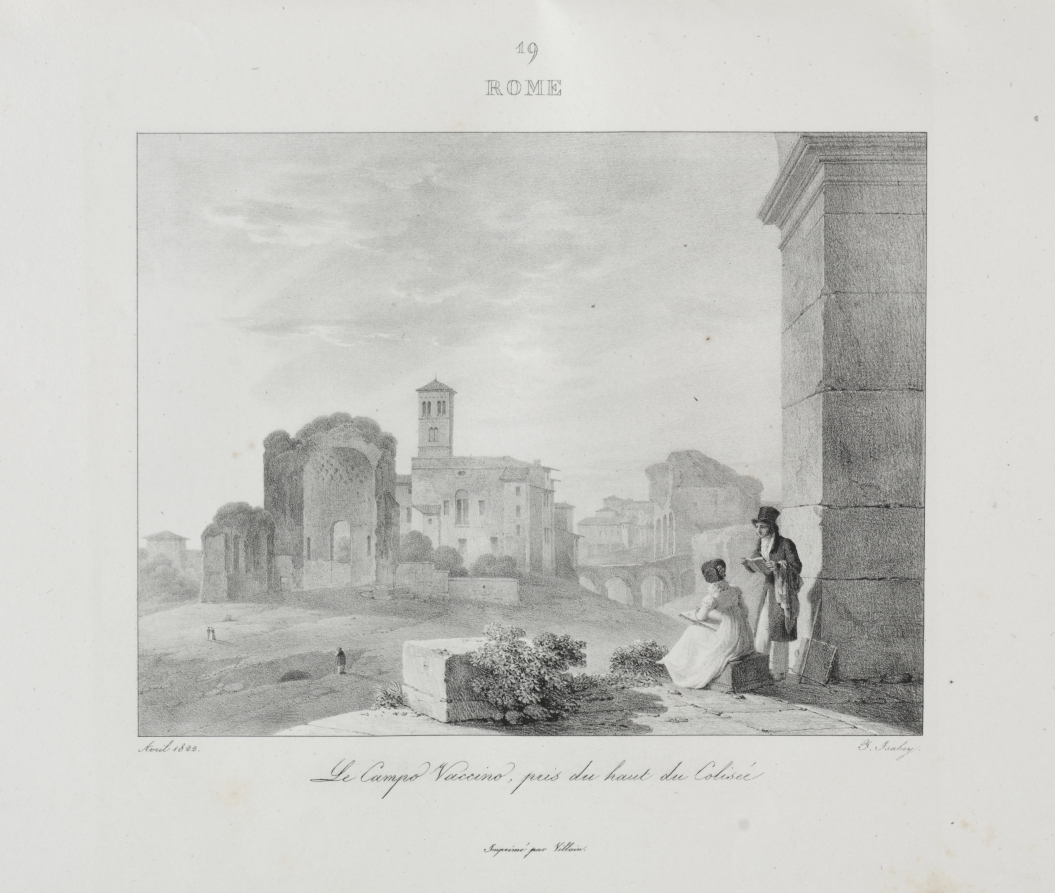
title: Voyage en Italie en 1822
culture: France, 19th century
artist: Jean-Baptiste Isabey (French, 1767–1855)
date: 1833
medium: lithograph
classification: Bound Volume